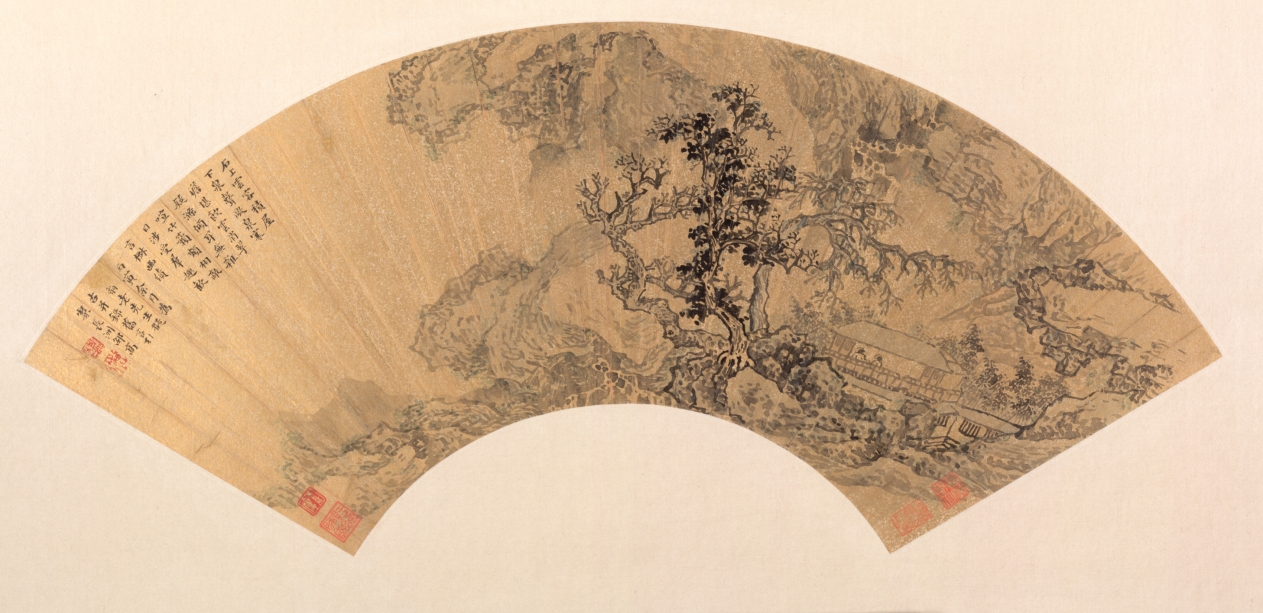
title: Landscape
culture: China, Suzhou, Ming dynasty (1368-1644)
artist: Shao Gao (Chinese, c. 1595-c. 1643)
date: 1626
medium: folding fan, ink and color on gold paper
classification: Painting